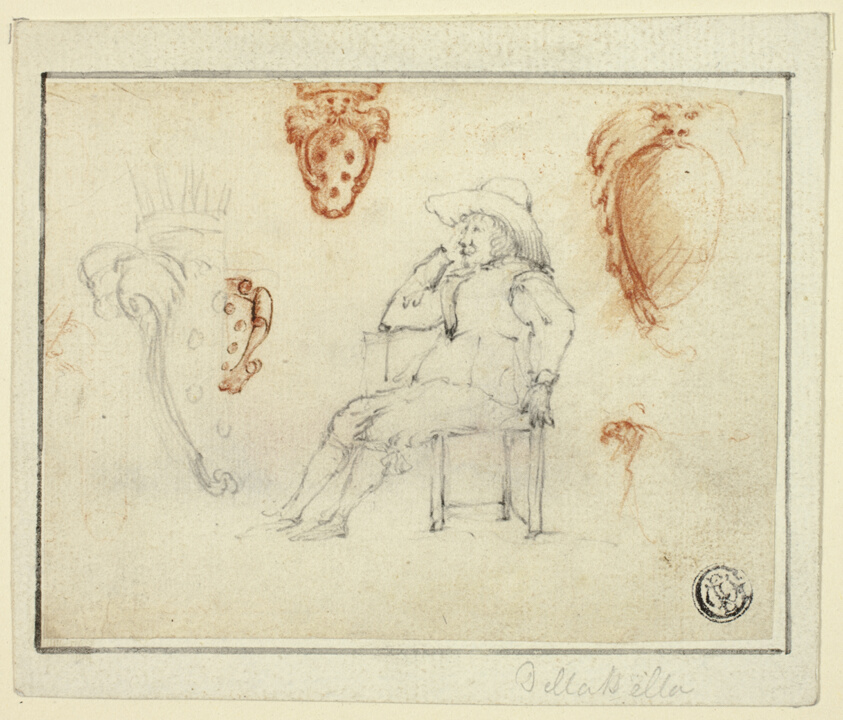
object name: Drawing and Watercolor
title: Sketches of Seated Man, Medici Coats of Arms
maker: Attributed to Stefano della Bella; Italian, 1610-1664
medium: Black and red chalk, with traces of pen and brown ink, on ivory laid paper, laid down on ivory laid paper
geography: Italy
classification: chalk; drawings (visual works); prints and drawing